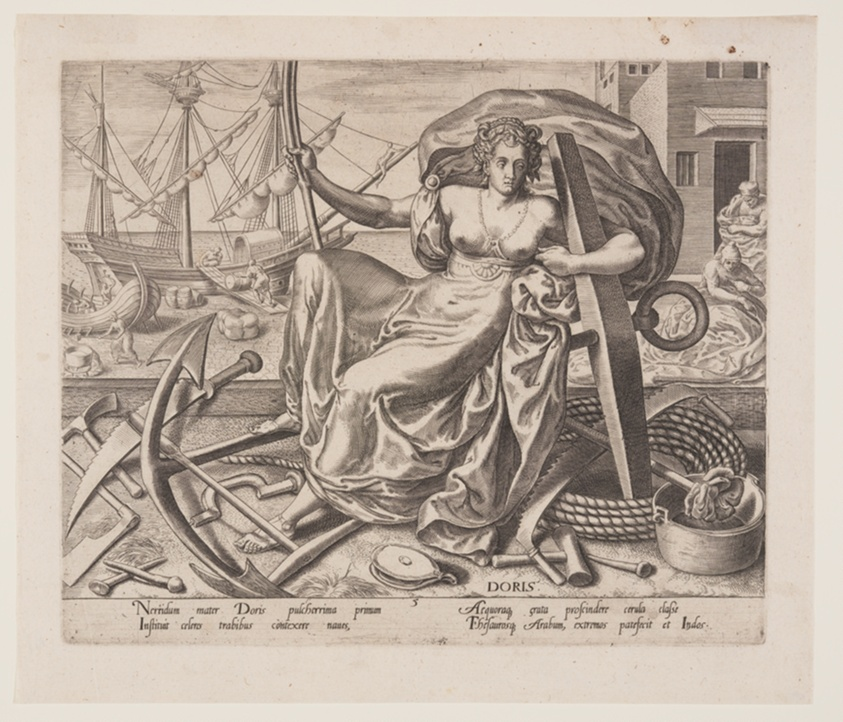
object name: Print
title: Doris, from The Occupations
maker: Philip Galle; Flemish, 1537–1612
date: 1574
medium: Engraving on ivory laid paper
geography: Flanders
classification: engraving; paper; print; prints and drawing